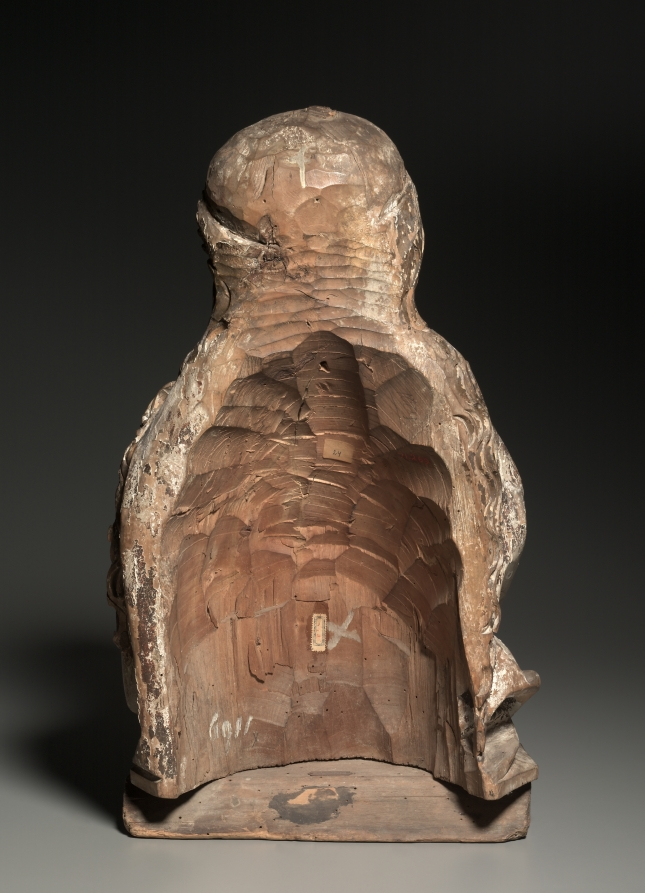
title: Female Bust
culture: Austria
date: c. 1470–1500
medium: painted and gilded lindenwood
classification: Sculpture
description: This female bust is part of a series of three in the museum's collection. The identity of the figures has been speculated by scholars but without resolution. Because this and the other female busts in the series do not retain their attributes, it is difficult to know their original purpose. It is possible that they may have once formed a group of female saints from the predella of a large altarpiece. Since the sculpture is not carved in the round, this hypothesis has merit. Another recent proposal is that this and the other sculptures may be from a series of female busts representing the wise and foolish virgins referenced in Matthew 25:1-13, a parable by Jesus admonishing listeners to be spiritually prepared.